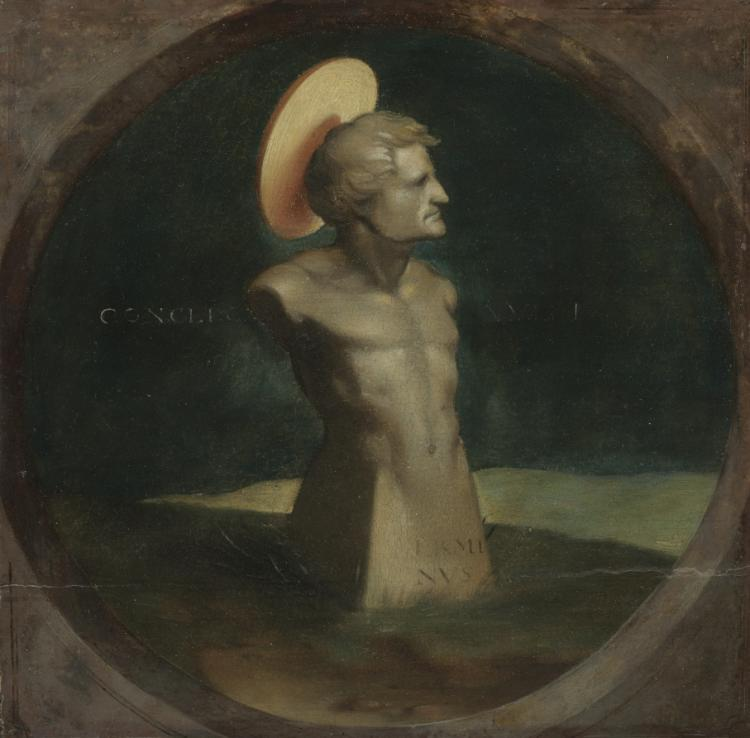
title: Terminus, the Device of Erasmus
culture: Germany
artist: Hans Holbein the Younger (German, active England and Switzerland, 1497/98–1543)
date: c. 1532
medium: oil on wood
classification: Painting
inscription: Inscribed in the middle: "CONCEDO NVLLI. [lower right: TERMI / NVS"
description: In the spirit of the Italian Renaissance, Erasmus of Rotterdam (c. 1466–1536), the celebrated Dutch humanist and scholar, embraced ancient Greek and Roman literature and incorporated much of its moral and ethical messages into his own work. Holbein here conflates Erasmus’s features with Terminus, the Roman god of boundaries, who defied Jupiter by maintaining his position atop Capitoline Hill. Erasmus adopted Terminus, along with the motto concedo nulli (I concede to no one), as a personal symbol for devotion and steadfastness.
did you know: Tree ring analysis helped determine the date of this painting.